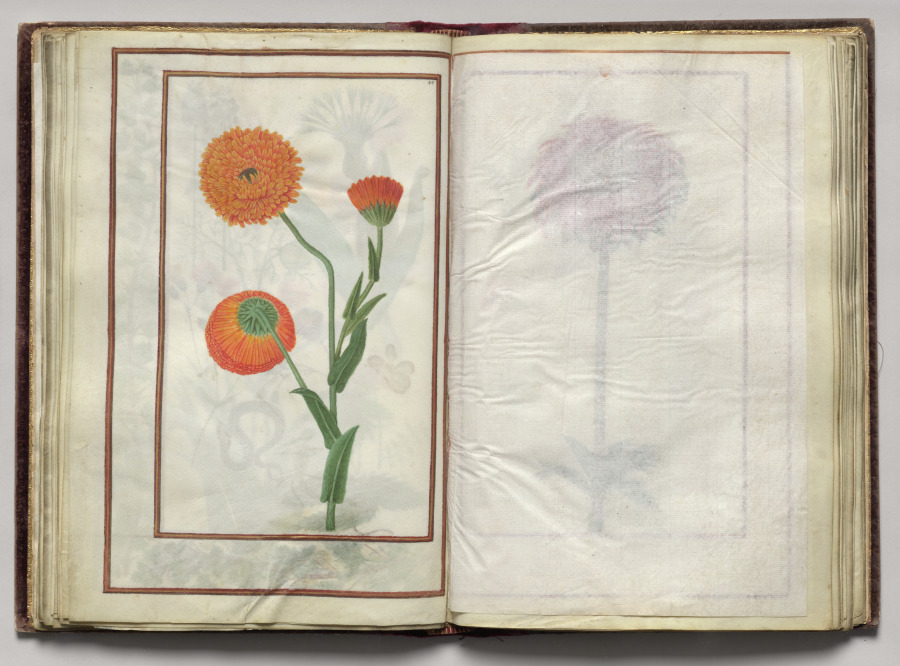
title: Florilegium (A Book of Flower Studies)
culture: France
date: 1608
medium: bound manuscript of 48 leaves, 77 drawings; watercolor, ink, silver, and gold over occasional traces of pencil, on vellum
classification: Bound Volume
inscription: Dated: Poitiers 1608 (on frontispiece) Signed: On frontispiece in black ink, lower right: Van Kuyk Notation on drawing: Frontispiece: in pencil, lower margin: * élève de Van Kessel, peintre flammand (* in pencil also appears in front of Van Kuyk's name).